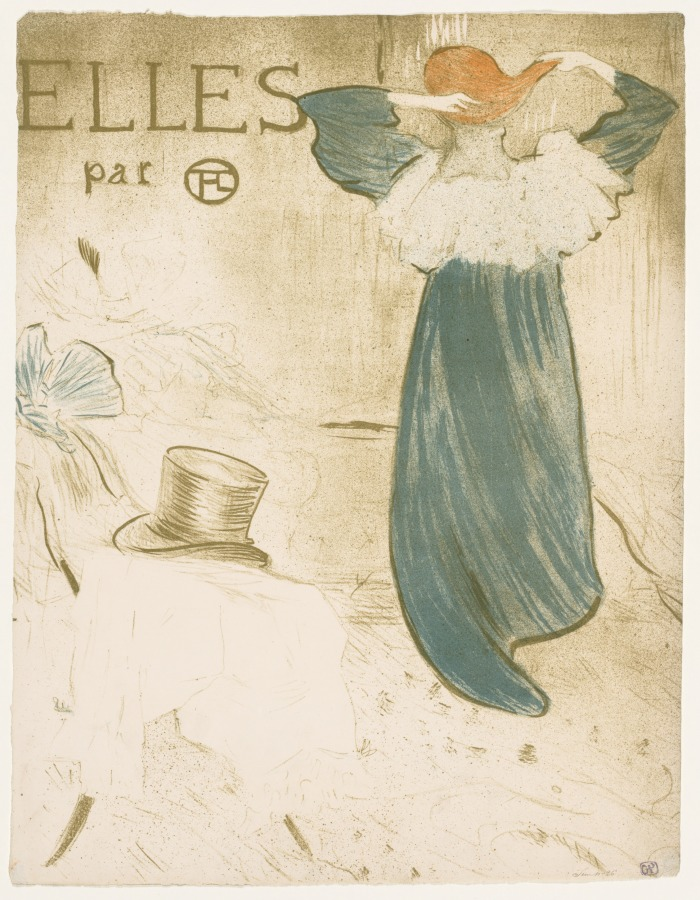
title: Elles: Frontispiece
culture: France, 19th century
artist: Henri de Toulouse-Lautrec (French, 1864–1901)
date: 1896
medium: color lithograph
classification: Print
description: The French publisher Gustave Pellet, hoping to attract new customers, persuaded Lautrec to make a series of ten prints, plus frontispiece and cover, depicting brothels. Although it was not unusual to see prostitutes pictured in the popular press, Lautrec was the first well-known, successful artist to tackle this subject. The set was a commercial failure when it first appeared, perhaps because the scenes are not erotic. Lautrec had said that "they are women to my liking", and between 1892 and 1895 he often lived in various Parisian brothels for weeks at a time. This allowed him to witness the daily lives of the women, including the intimate acts of sleeping and bathing, and to sense their suffering. The result is that only two of the scenes show prostitutes as desirable temptresses. The remainder depict the mundane routine of the women's private world, their caring for each other, their boredom, and, living on the periphery of society, their sense of isolation. Lautrec did not take a direct moral stand. He portrayed the women sympathetically, restoring to them their humanity. One scene shows Juliette Baron, whose life of vice has led to premature aging, bringing her daughter Paulette breakfast. Other images depict the women at private moments, bathing or combing their hair in natural, relaxed poses, unaware of being observed. The beauty of the drawing and use of color makes this set one of the masterpieces of late nineteenth-century French color lithography.